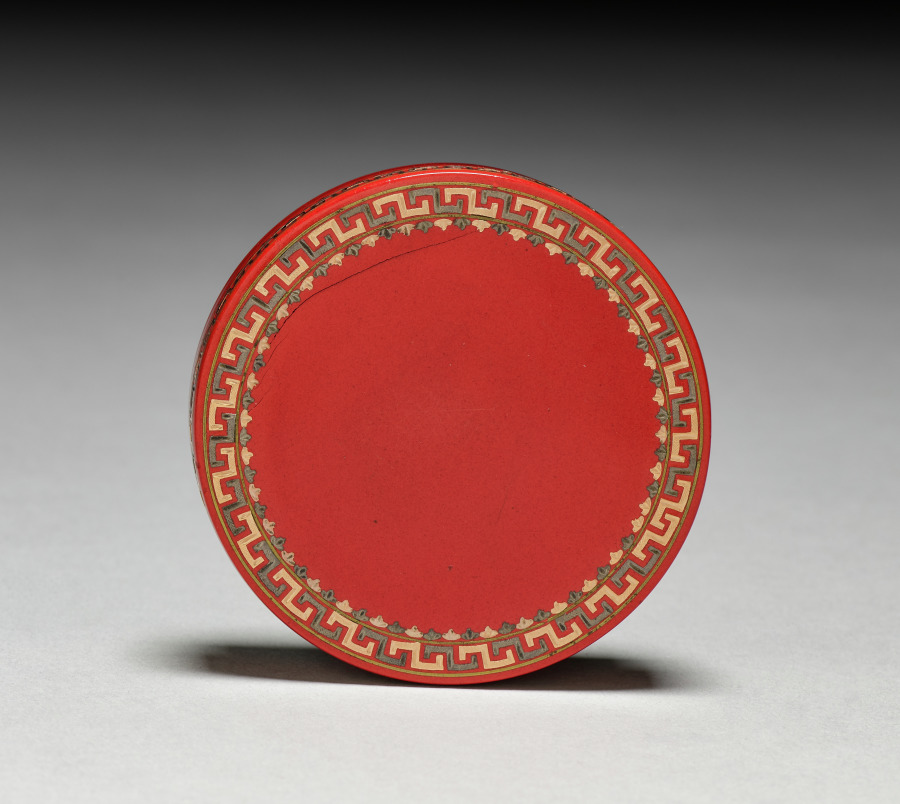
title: Round Box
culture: France, 18th century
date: c. 1760–70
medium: Tortoiseshell with red lacquer; inlays of gold, silver, and brass wire; contains a portrait miniature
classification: Miscellaneous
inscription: miniature inscribed: annee [?]/1767.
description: This small lacquer box, made in France during the 1700s, references China in that it imitates Chinese material and craftmanship such as red lacquer and celadon. This round box with an inlaid key pattern (an interlocking geometric motif ), emulates the bright vermilion color of Chinese red lacquer, typical of Suzhou lacquer ware. The key pattern is reminiscent of the so-called Chinese thunder pattern (leiwen).